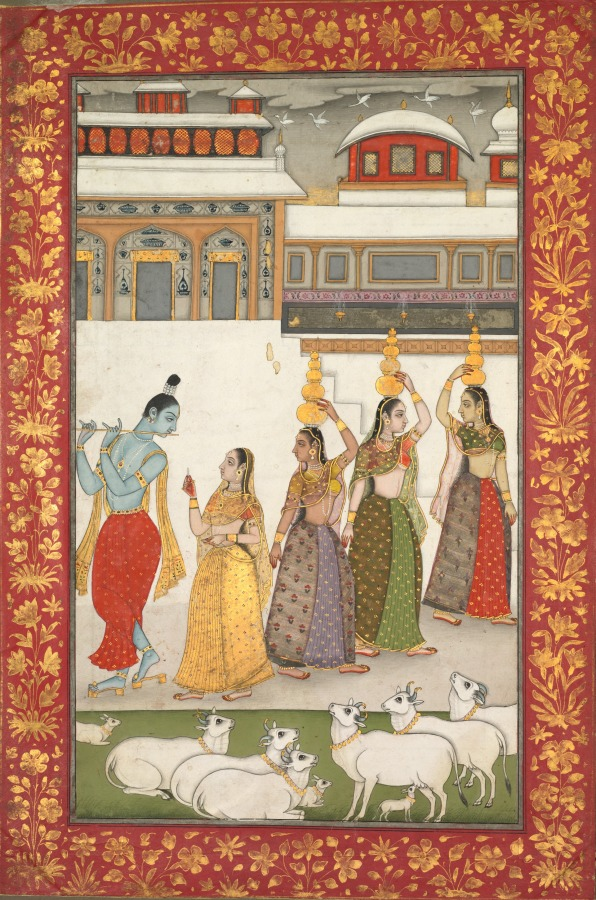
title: Gujari Ragini (Krishna with Gopis Playing the Flute), from a Ragamala Series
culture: India, Deccan, Aurangabad, 18th century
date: mid-1700s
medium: Gum tempera, ink, and gold on paper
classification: Painting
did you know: Krishna is wearing paduka sandals, which have a post and a stub to provide grip between the big and second toes.